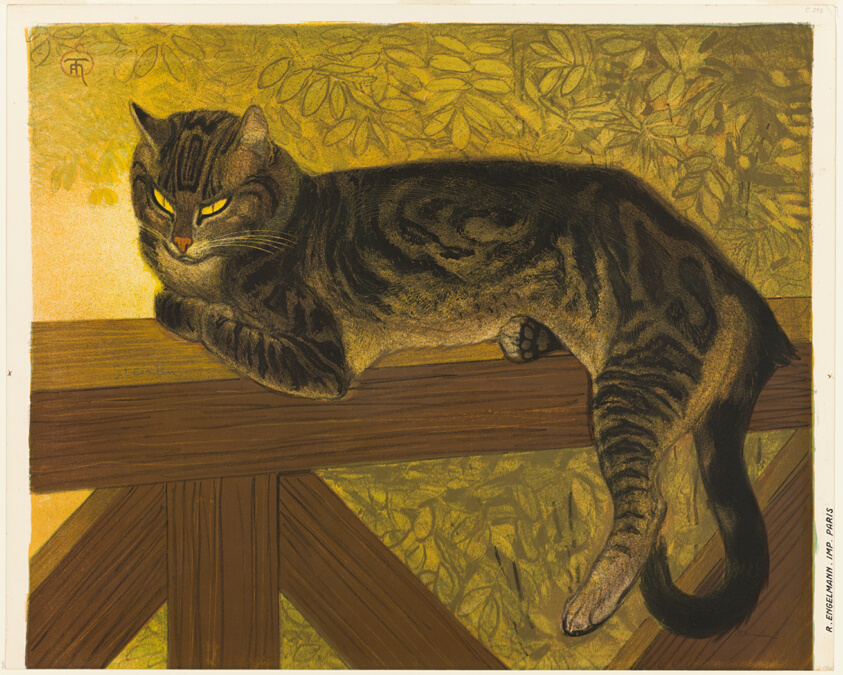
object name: Print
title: Summer: Cat on a Balustrade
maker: Théophile-Alexandre Steinlen; French, born Switzerland, 1859-1923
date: 1909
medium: Lithograph (crayon, brush and spatter with scraper) in green, yellow-orange, brown and black on cream wove paper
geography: France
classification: lithograph; print; prints and drawing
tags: cats, animals